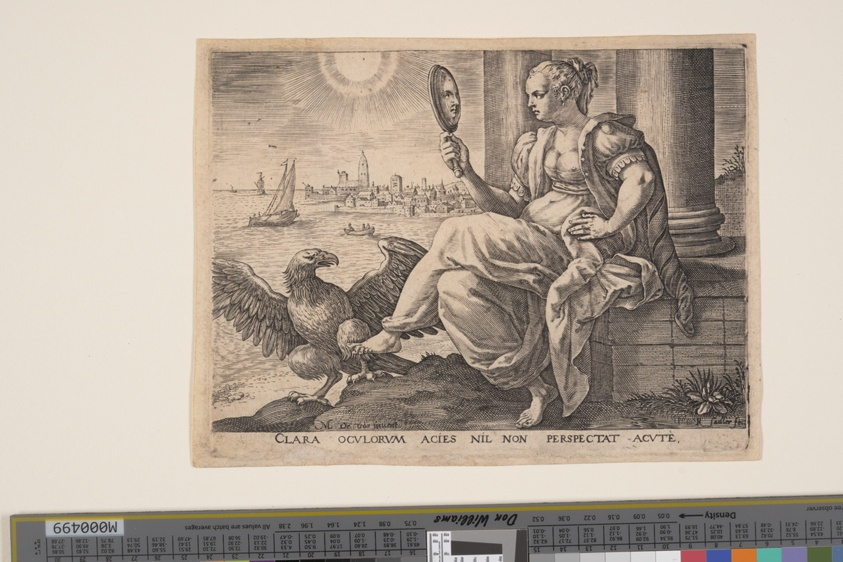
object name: Print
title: Sight, from The Five Senses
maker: Raphael Sadeler I (Flemish, 1560/61–1628/32); after Maarten de Vos (Flemish, 1532–1603)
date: 1581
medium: Engraving on paper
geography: Flanders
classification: engraving; paper; print; prints and drawing